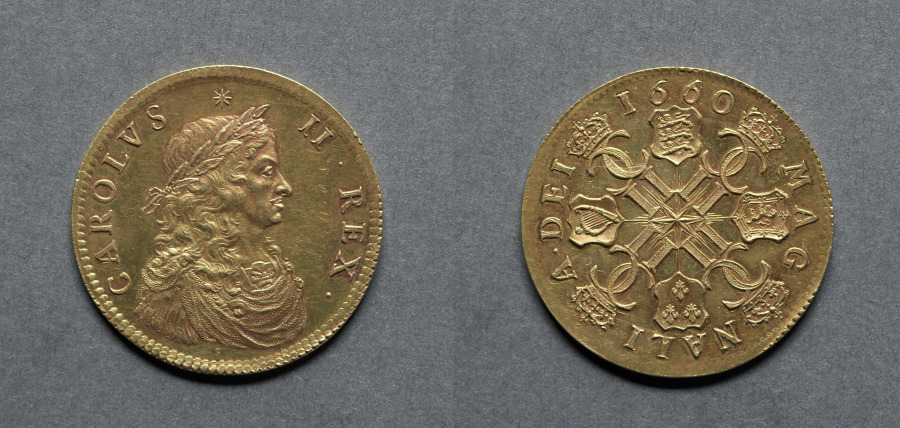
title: Broad: Charles II (obverse); Shields (reverse)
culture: England, Charles II, 1660-1685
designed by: Thomas Simon (British, c. 1623–1665)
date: 1660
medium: gold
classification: Coins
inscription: CAROLVS * II . REX .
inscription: 1660 MAG MALI A·DEI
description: The hammered series of English coins was now nearing its end. In 1662 and from that time forward, all coins were produced by the mill and screw press, which gradually developed into modern minting machinery. From 1660 till 1662 hammered coins were still produced while the Mint was being reformed. In preparing the designs for the new mill coinage many pattern pieces were produced, of which this rare and exceptionally attractive piece is one.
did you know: The shields on the reverse show England, Scotland, France, and Ireland in a cruciform shape with crowned interlocked Cs in between.